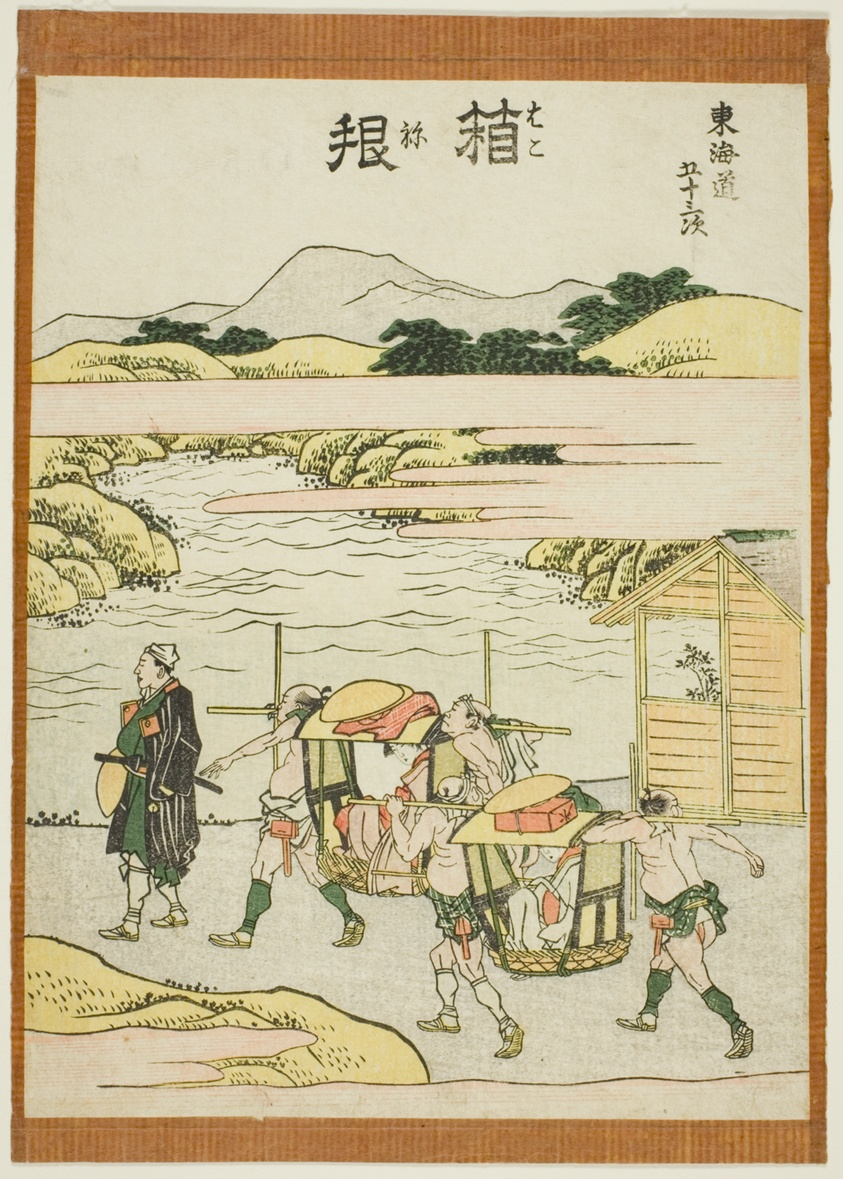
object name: Print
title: Hakone, from the series "Fifty-three Stations of the Tokaido (Tokaido gojusan tsugi)"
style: Japanese (culture or style)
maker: Katsushika Hokusai 葛飾 北斎; Japanese, 1760-1849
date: c. 1806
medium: Color woodblock print; chuban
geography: Japan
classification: woodblock print; print; asian art